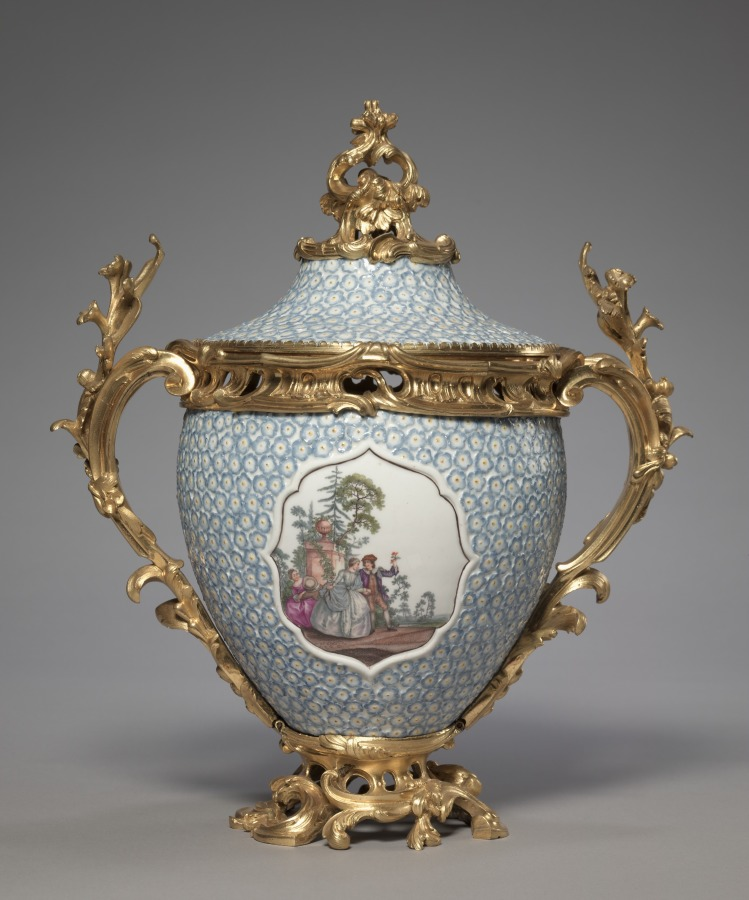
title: Covered Vase (2 of 2)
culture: Germany, Meissen, 18th century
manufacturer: Meissen Porcelain Factory (German, est. c. 1710)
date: mid-1700s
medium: porcelain mounted in gilt bronze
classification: Ceramic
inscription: on obelisk located in one of the cartouche openings, the date 1749 appears.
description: One of these vases is dated 1749. They were perhaps part of a set of four covered vases that we know from documents were acquired by Mme. de Pompadour, mistress of Louis XV in 1752.